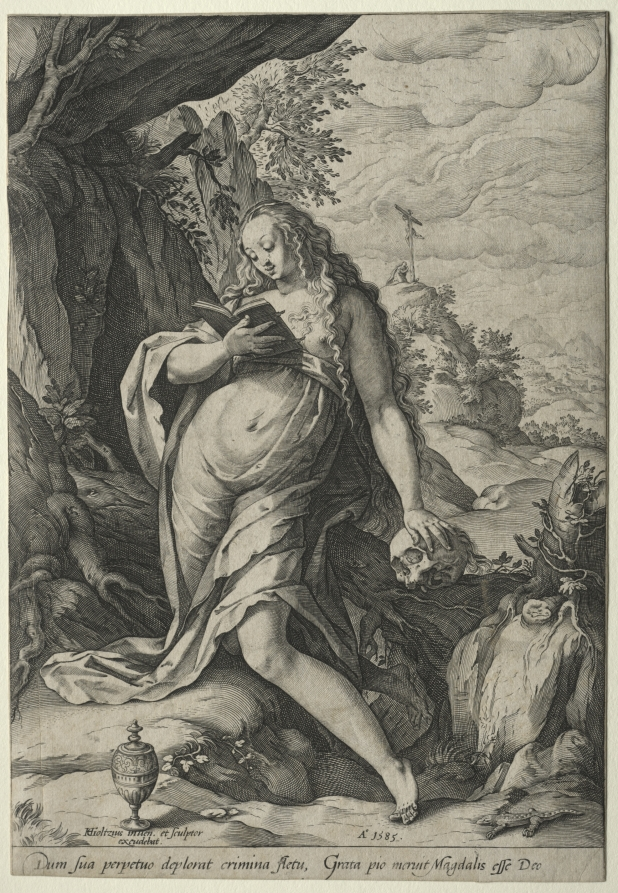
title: The Magdalen in Penance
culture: Netherlands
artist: Hendrick Goltzius (Dutch, 1558–1617)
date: 1585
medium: engraving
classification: Print